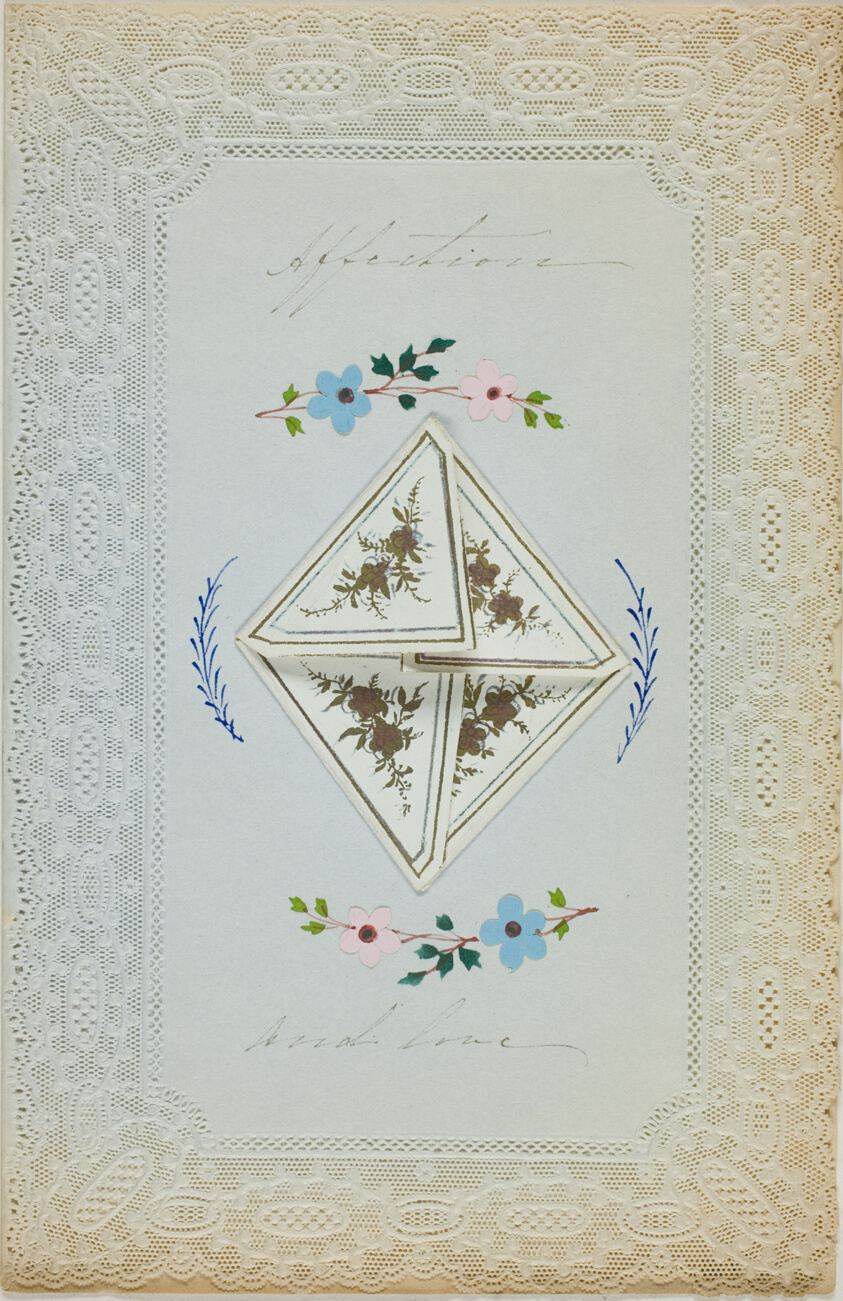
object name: Drawing and Watercolor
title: Affections and Love (Valentine)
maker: Unknown Artist; English, 19th century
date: c. 1850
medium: Collaged elements with watercolor and pen and brown ink on cut and embossed ivory wove paper (lace)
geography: England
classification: valentine; prints and drawing; paper